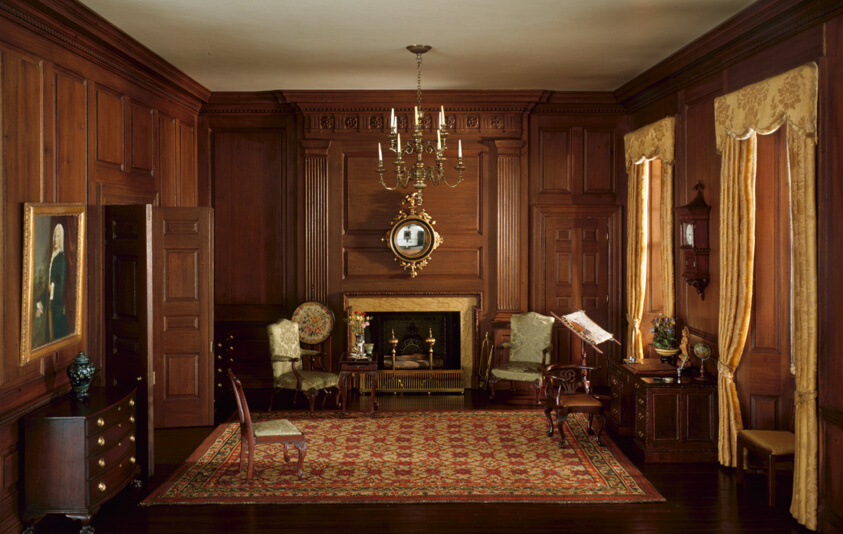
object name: Miniature room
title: A25: Virginia Drawing Room, 1755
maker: Designed by Narcissa Niblack Thorne; American, 1882-1966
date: c. 1940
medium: Miniature room, mixed media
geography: United States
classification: miniature; thorne rooms